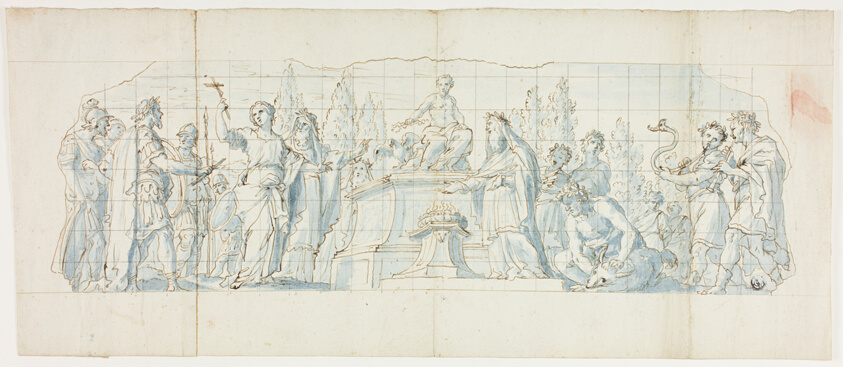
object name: Drawing and Watercolor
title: Saint Bibiana Refusing to Sacrifice to Jupiter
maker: Antonio Grano (Italian, died 1718)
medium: Pen and brown ink and brush and blue wash, on ivory laid paper, squared with black chalk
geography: Italy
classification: pen and ink drawings; drawings (visual works); prints and drawing